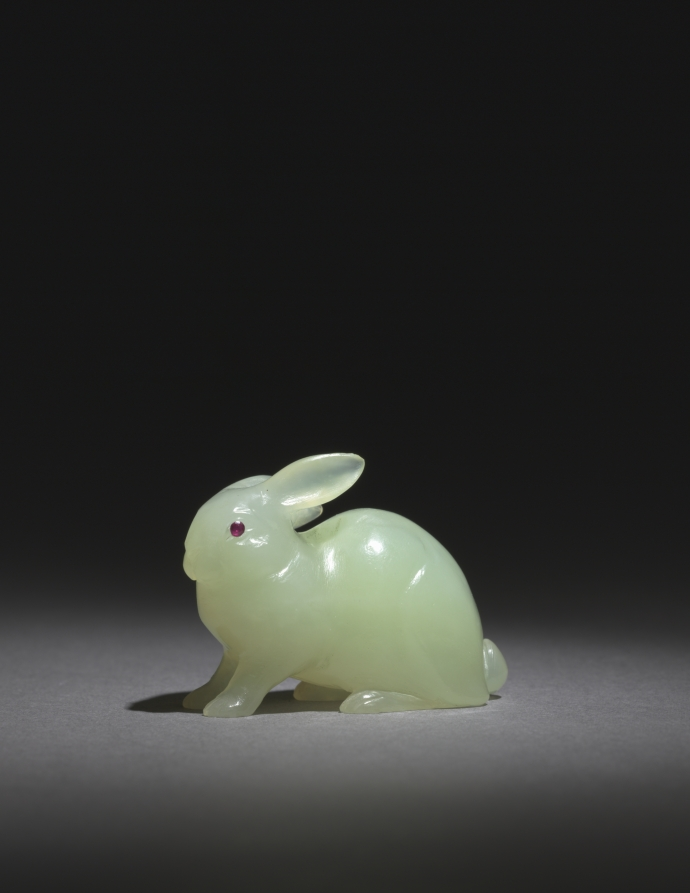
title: Rabbit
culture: Russia, St. Petersburg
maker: House of Fabergé (Russian, 1842–1918)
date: late 1800s-early 1900s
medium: jade, (bowemite?), rubies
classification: Miscellaneous